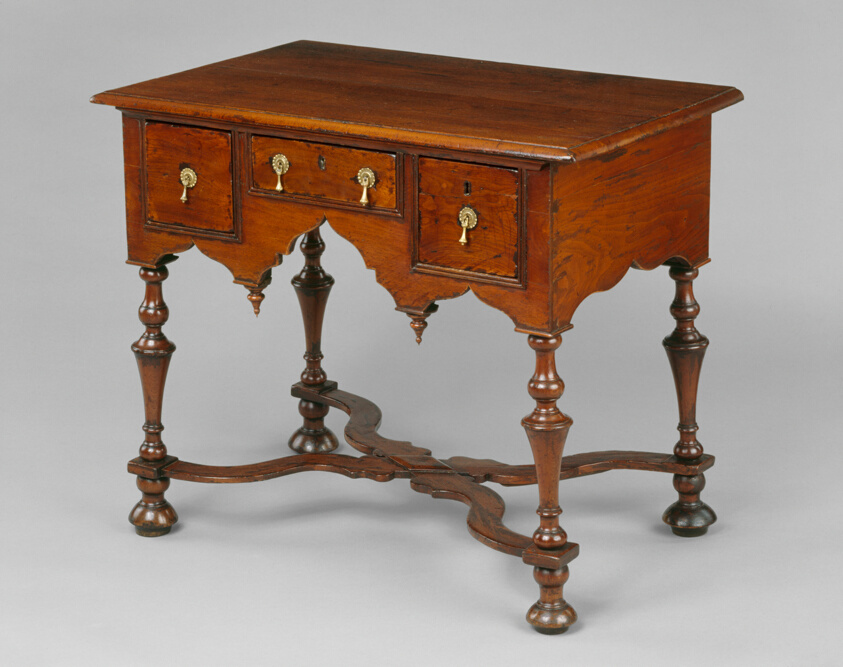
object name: Furniture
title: Dressing Table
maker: Artist unknown (American, 18th century); Philadelphia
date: 1700–30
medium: Walnut with Southern yellow pine, white pine, and white cedar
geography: Philadelphia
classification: table; furniture; american decorative arts; american arts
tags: fashion, furniture